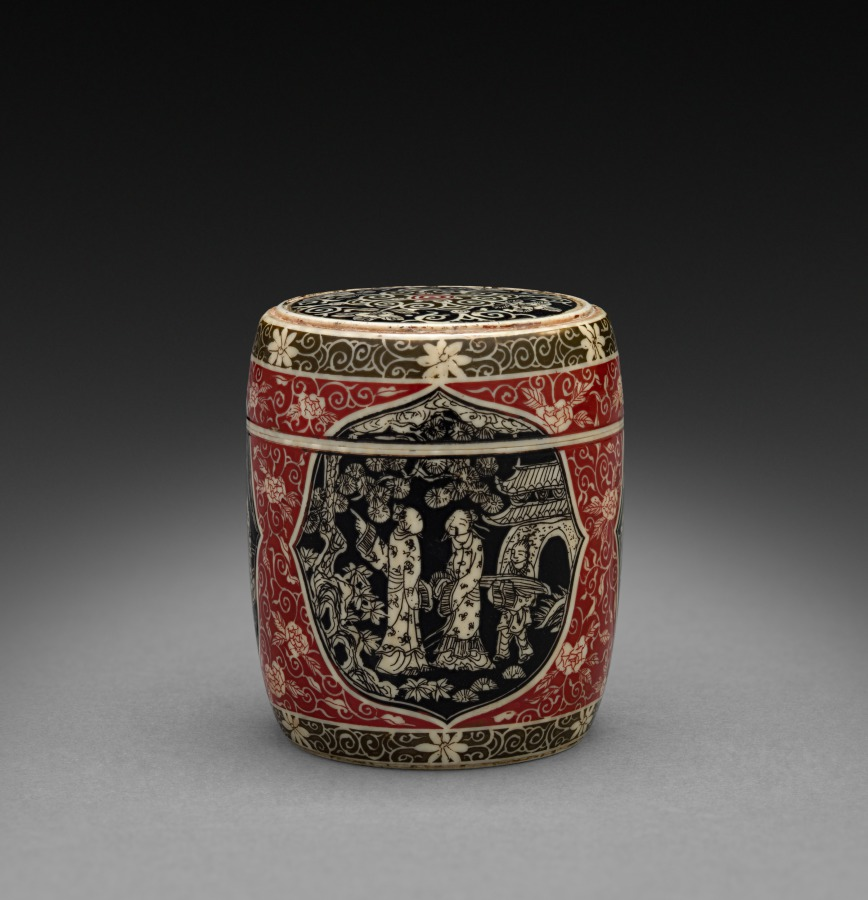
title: Miniature Garden Seat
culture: China, Qing dynasty (1644-1911), Qianlong mark and reign (1736-95)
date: late 1700s–early 1800s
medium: ivory with pigments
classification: Ivory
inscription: 乾隆貢器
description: In the Qing dynasty (1644–1911), luxury items became more affordable to larger parts of the society, including women, merchants, and literati in non-official positions. Imperial patronage and a growing urban population encouraged consumption of luxury goods and local craftmanship. This ivory carved and painted to resemble a miniature garden seat illustrates the superb skills and the creative mind of the talented artisans who sought clients on a competitive market.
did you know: A servant carrying a qin, zither, accompanies two gentlemen admiring the trees.